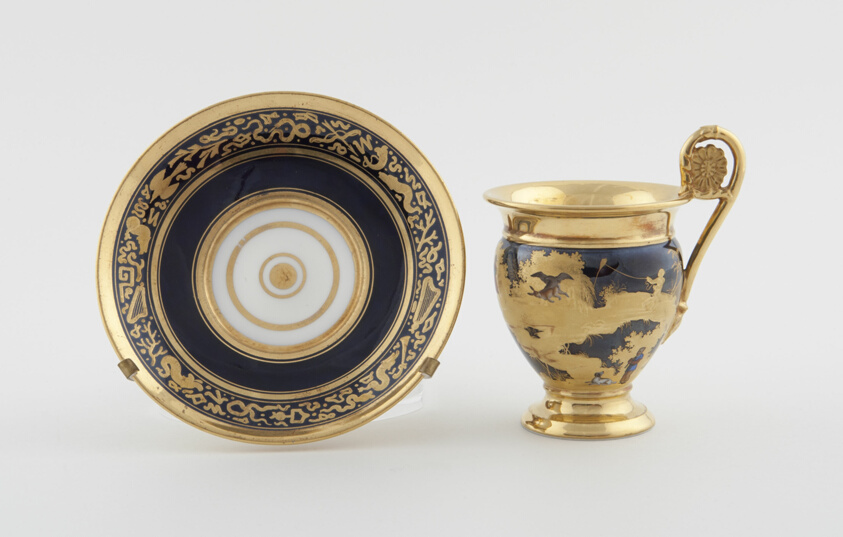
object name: Ceramics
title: Cup and Saucer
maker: Denuelle Porcelain Manufactory (French, 1818-1829)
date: c. 1820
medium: Hard-paste porcelain, polychrome enamels, and gilding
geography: Paris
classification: drinking vessel; porcelain; ceramics